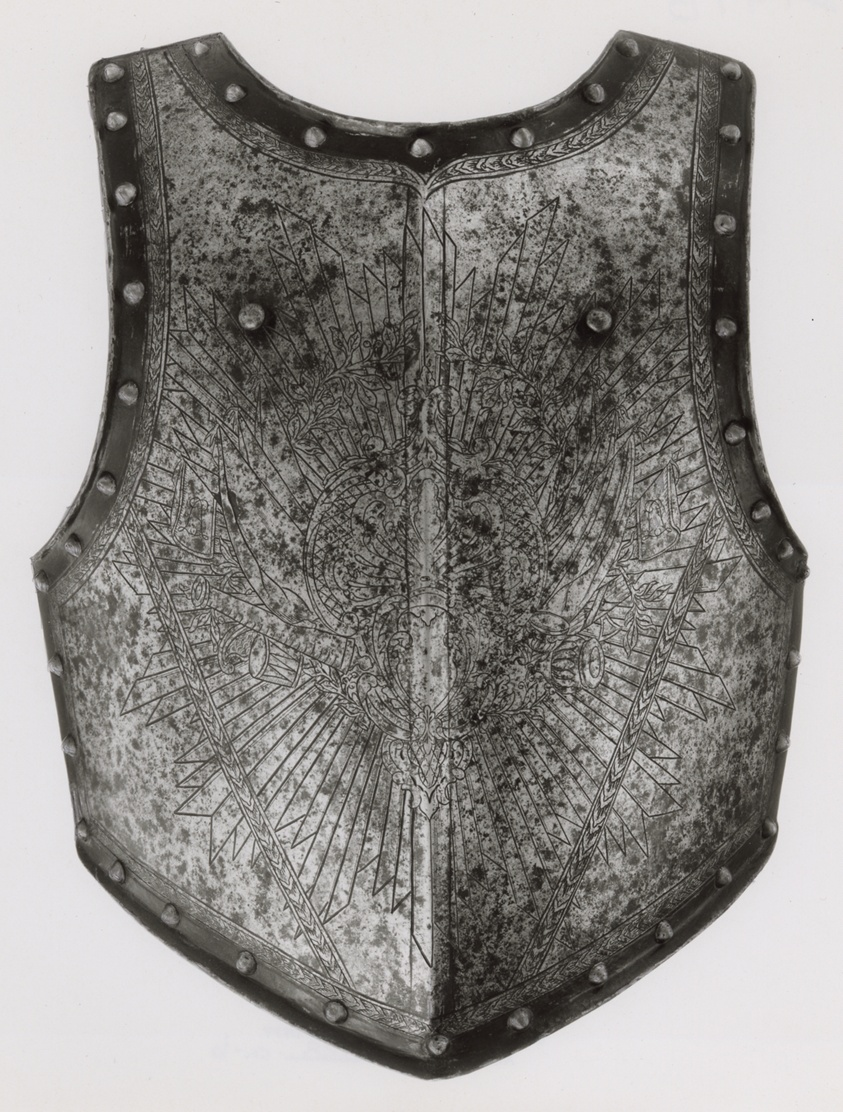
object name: Armor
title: Breastplate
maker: French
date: 1670-1700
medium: Steel, brass, and paint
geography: France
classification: suit-element; armor; arms and armor